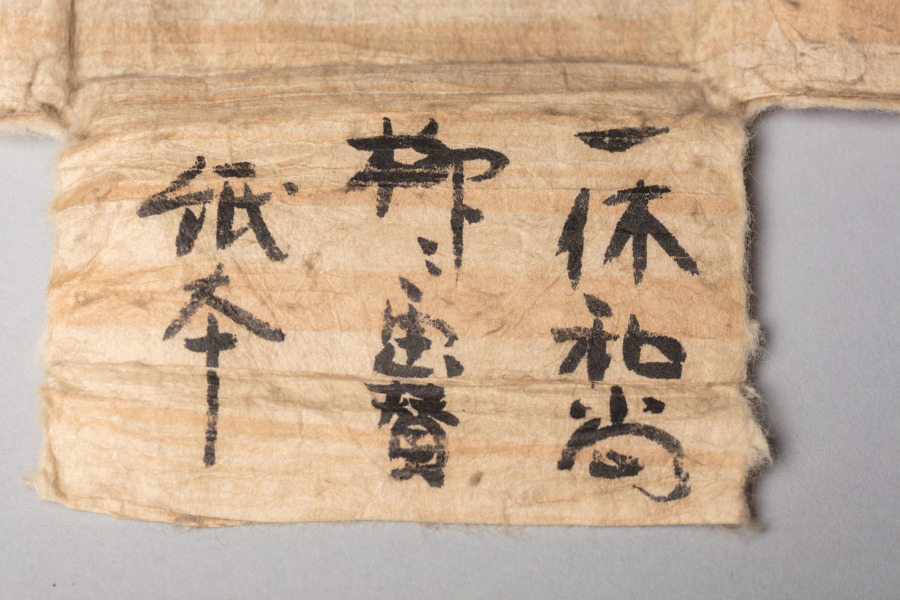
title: Calligraphy with Willow and Swallows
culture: Japan, Muromachi period (1392–1573)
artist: Ikkyū Sōjun (Japanese, 1394–1481)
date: 1400s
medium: hanging scroll, ink on paper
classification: Painting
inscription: How many days has it rid itself of the crow’s cloth? It knows not!/ Lovely is its body so nimble and neat./ Neither men of wealth, courtly position, or power can come close to the unfettered, noble swallow!/ With the coming of spring, it seems to be flying about, dancing around the grass hut of the foolish Priest. signed: Unkasō Isshi Tōkai jun Ikkyū shi ga ippitsu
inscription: outer box inscribed: Ikkyū Ōshō Enshi-zu Jigasan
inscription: inner box side lid inscribed: Showa 50 (1975), November by Tayama Honan with kao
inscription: Inner box side lid inscribed: Ikkyū Ōshō Bokuseki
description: The famed Buddhist monk Ikkyū is best remembered for his calligraphy. Calligraphic conventions of his time called for brushwork that did not vary much in style from character to character. However, as Ikkyū’s lines progress, his brushwork wanders between standard script and a sort of shorthand, marked by an uneven distribution of ink and a reduction of the characters to only the most necessary strokes. Ikkyū’s direct communication of emotion via brushwork became characteristic of the works produced by monks affiliated with the temple Daitokuji later in the Edo period (1615–1868).